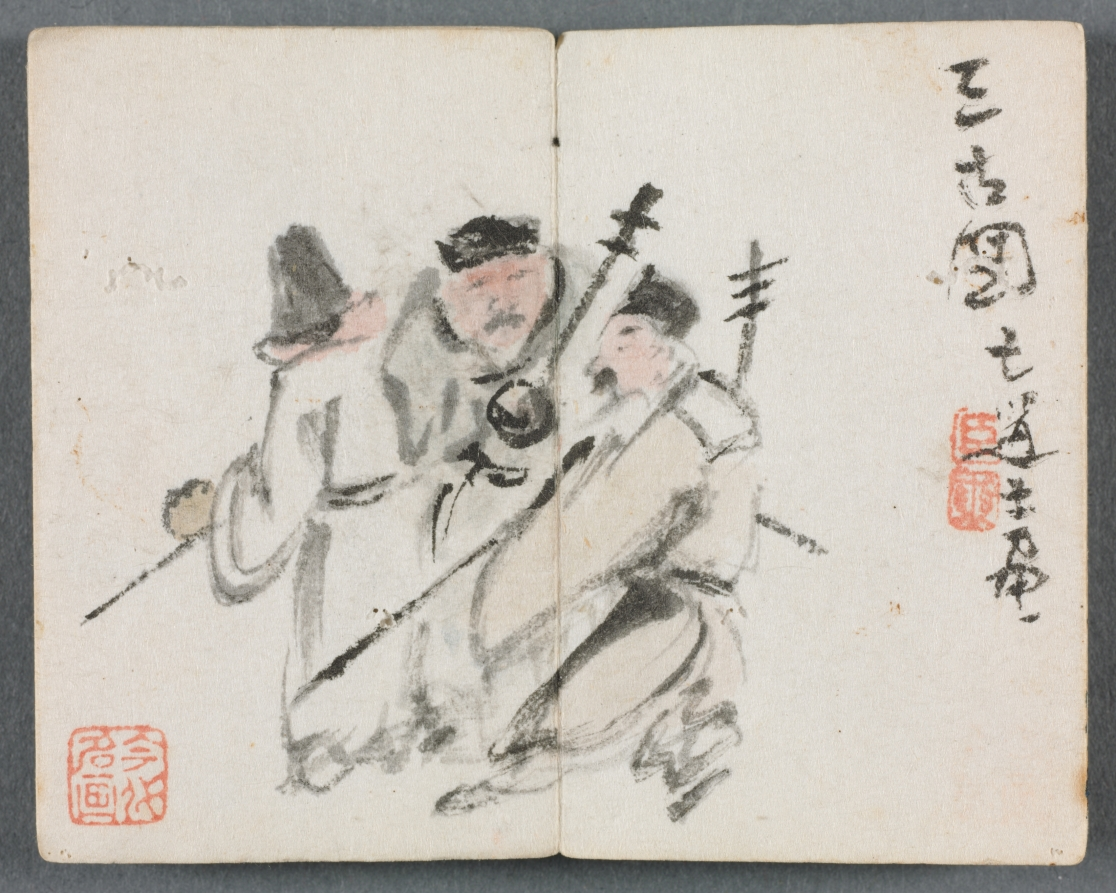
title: Miniature Album with Figures and Landscape (Three Men)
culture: China, Qing dynasty (1644–1911), Qianlong reign (1736–95)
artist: Zeng Yandong (Chinese, c. 1751–1827)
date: 1822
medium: album leaf, ink and color on paper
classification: Painting